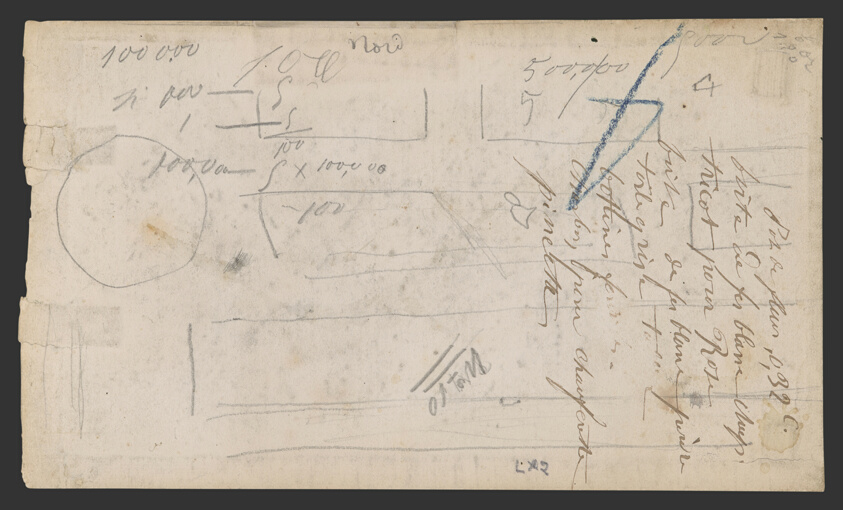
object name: Drawing and Watercolor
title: Sketchbook No. 2 (L'Estaque)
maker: Paul Cézanne; French, 1839-1906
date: 1875–86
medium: Graphite and pen and ink drawings on paper, bound into a book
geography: France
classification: sketchbook; graphite; prints and drawing; paper